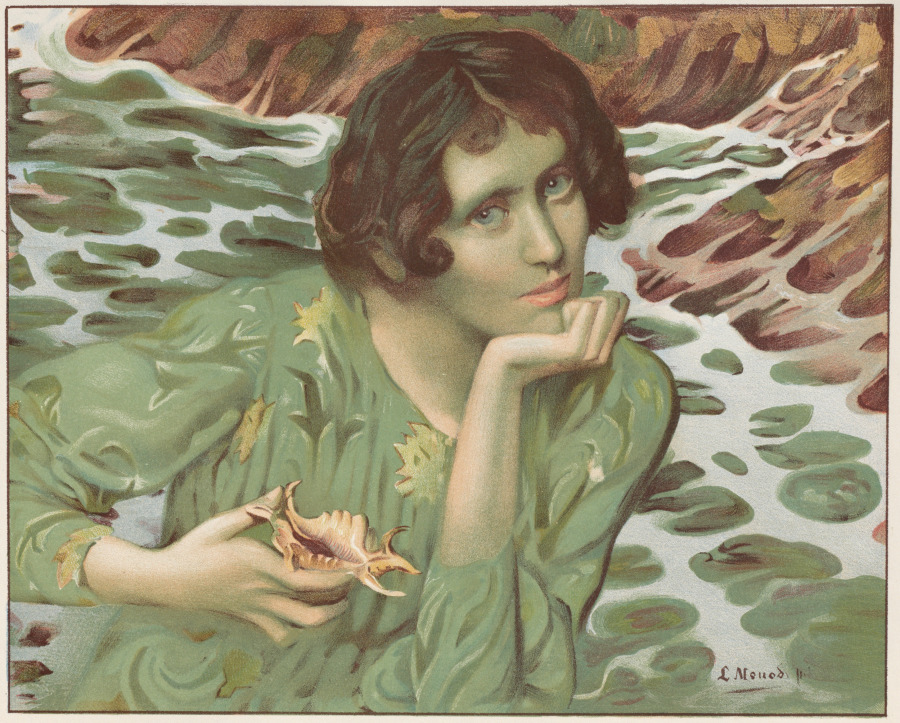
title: La Voix des Sources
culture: France, 19th century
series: L'Estampe Moderne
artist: Lucien-Hector Monod (French, 1867–1957)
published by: Imprimerie Champenois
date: 1899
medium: Color lithograph from bound volume containing 50 lithographs, each with a tissue paper guard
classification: Bound Volume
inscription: In plate: lower right corner of image (upper right corner if oriented like book): L Monod II; upper right corner of sheet: blindstamp of l'Estampe Moderne (Lugt 2790)